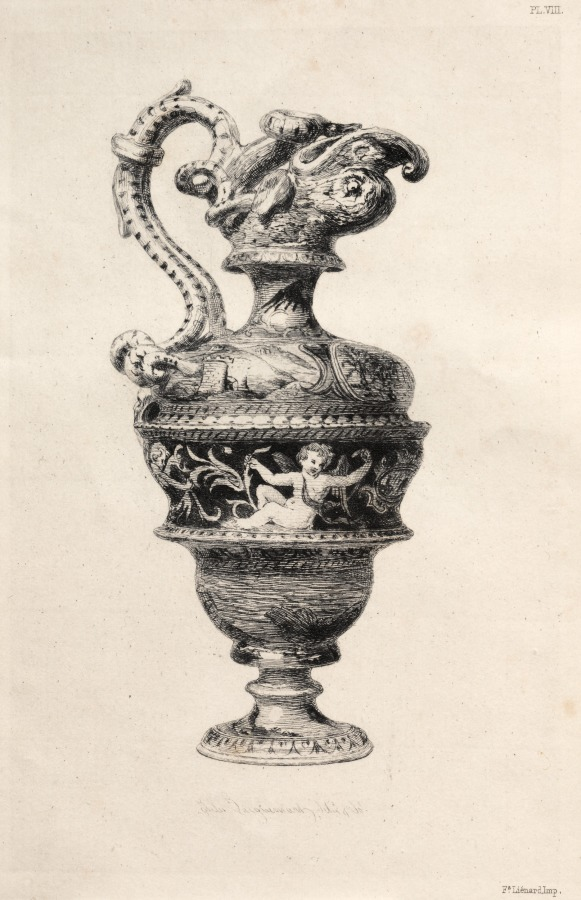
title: History of the Ceramic Art: A Descriptive and Philosophical Study of the Pottery of All Ages and All Nations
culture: France, 19th century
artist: Jules Jacquemart (French, 1837–1880)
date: 1877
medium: etching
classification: Bound Volume